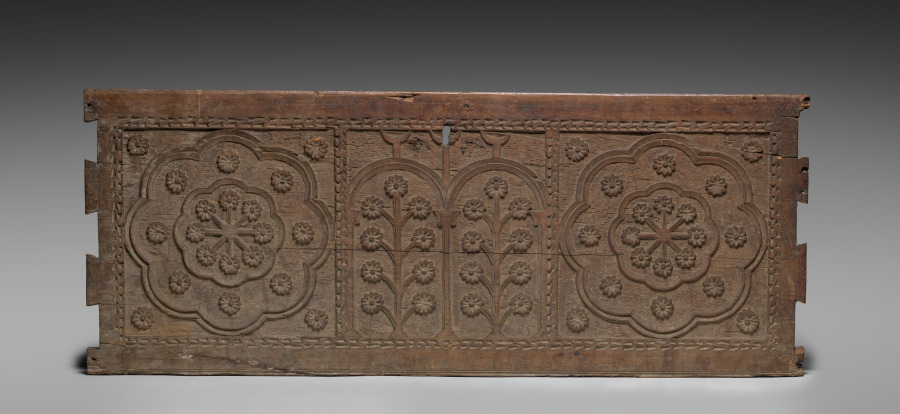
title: Chest Front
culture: India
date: c. 1700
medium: wood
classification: Furniture and woodwork